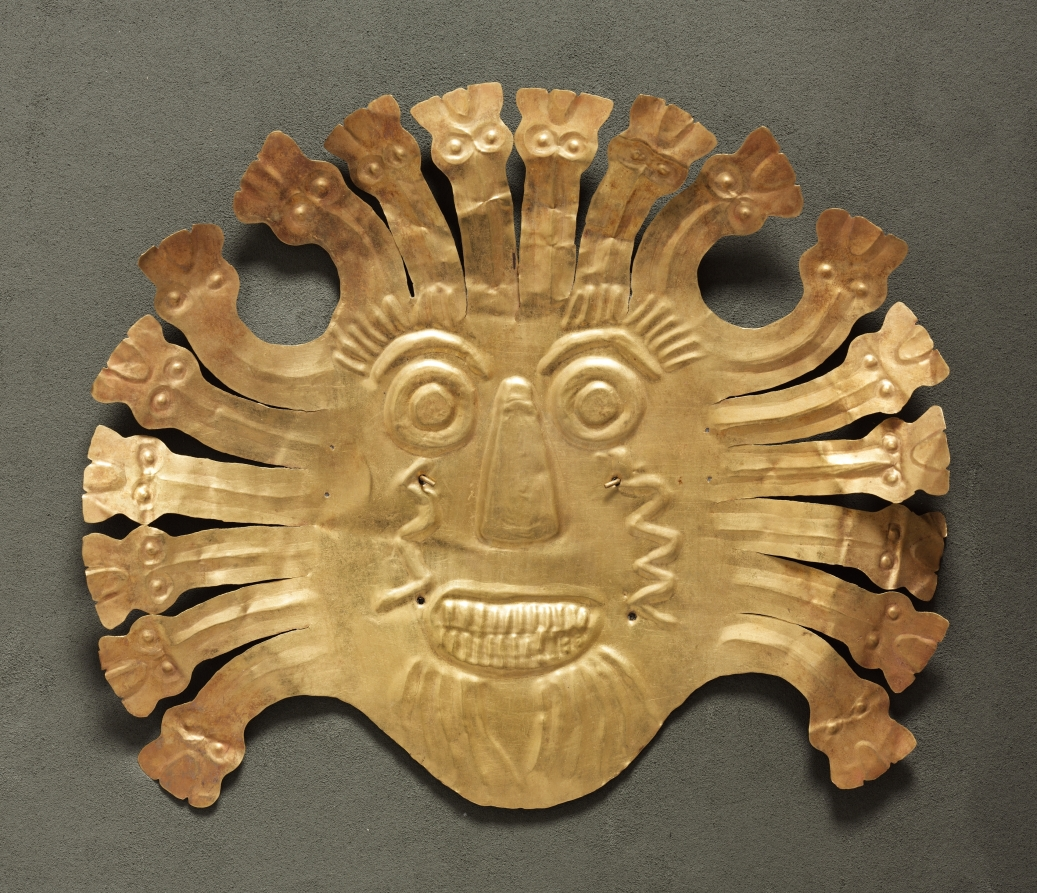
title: Mask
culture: Peru, South Coast, Nasca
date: 100 BCE–700 CE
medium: hammered gold alloy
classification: Metalwork